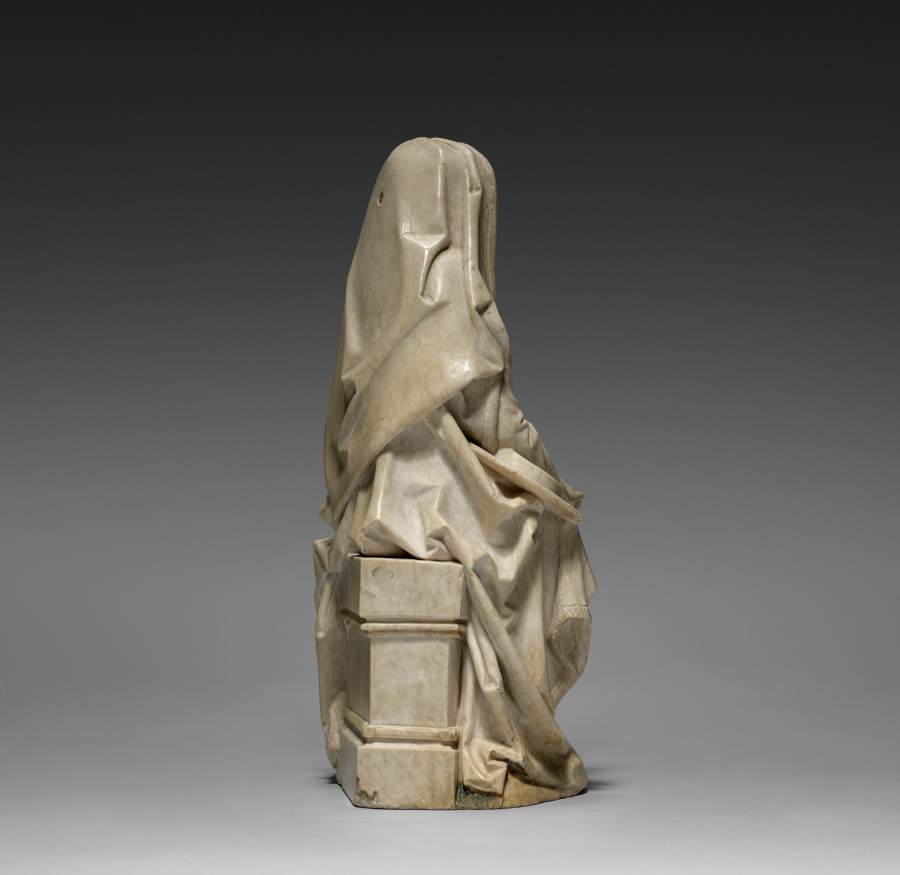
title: Saint Jerome and the Lion (From the former Church of St. Peter in Erfurt)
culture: Germany, Würzburg, late 15th Century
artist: Tilman Riemenschneider (German, active Würzburg, c. 1460–1531)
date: c. 1495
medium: alabaster, traces of polychromy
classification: Sculpture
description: According to legend, Saint Jerome (347–420 bce) lived in the desert, where he removed a thorn from an injured lion. Jerome is venerated in the Catholic Church as a Church Father, an important early author of Christianity. Here, he wears cardinal’s clothing from around 1500. Tilman Riemenschneider focused on Jerome’s relationship with the lion, creating empathy for the wounded animal. The delicacy of the depiction, which may have been partially painted to add highlights, is typical of alabaster, as is its fine polishing. The cord of the cardinal’s hat, missing today, may have been supplemented from another material.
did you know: In the story Saint Jerome encounters a fearsome lion, here depicted as diminutive, gentle, and submissive.